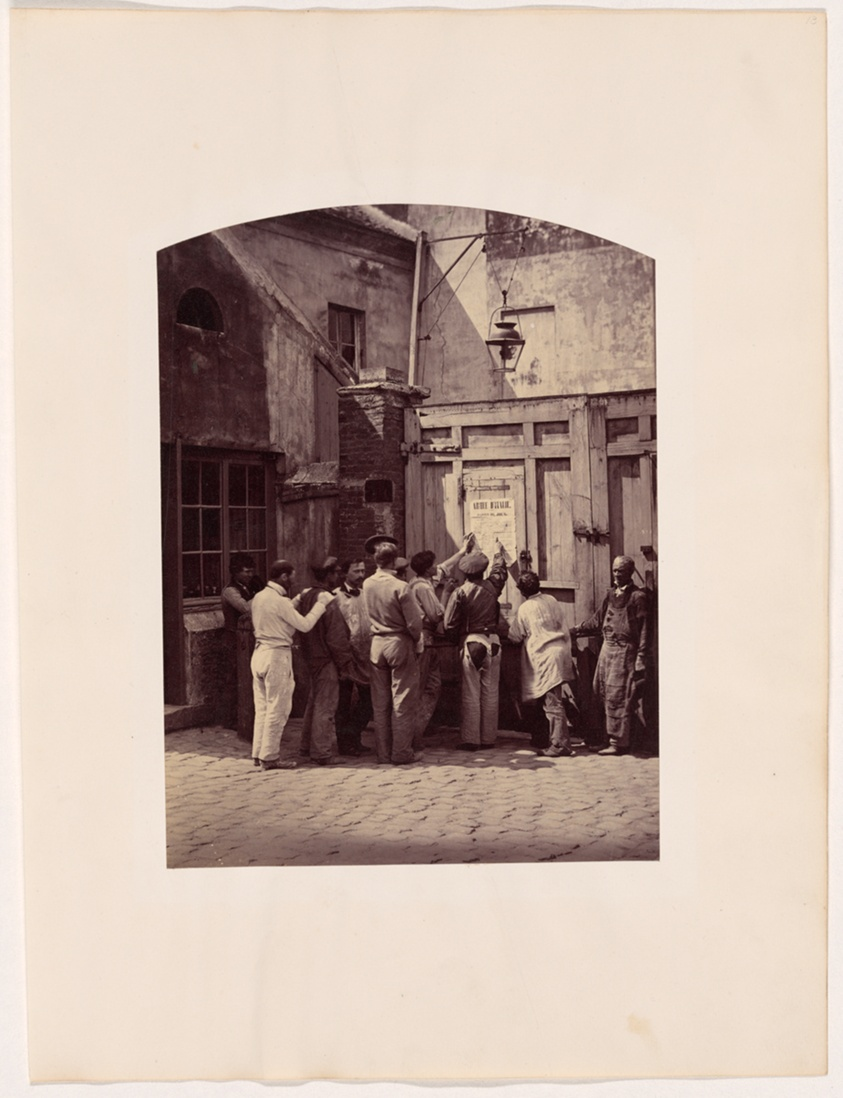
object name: Photograph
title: The Day's Orders (L'Ordre du Jour)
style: 19th century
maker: Camille Silvy (French, 1834-1910)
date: May 1859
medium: Albumen print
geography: France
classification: photograph; albumen silver print; photography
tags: Paris